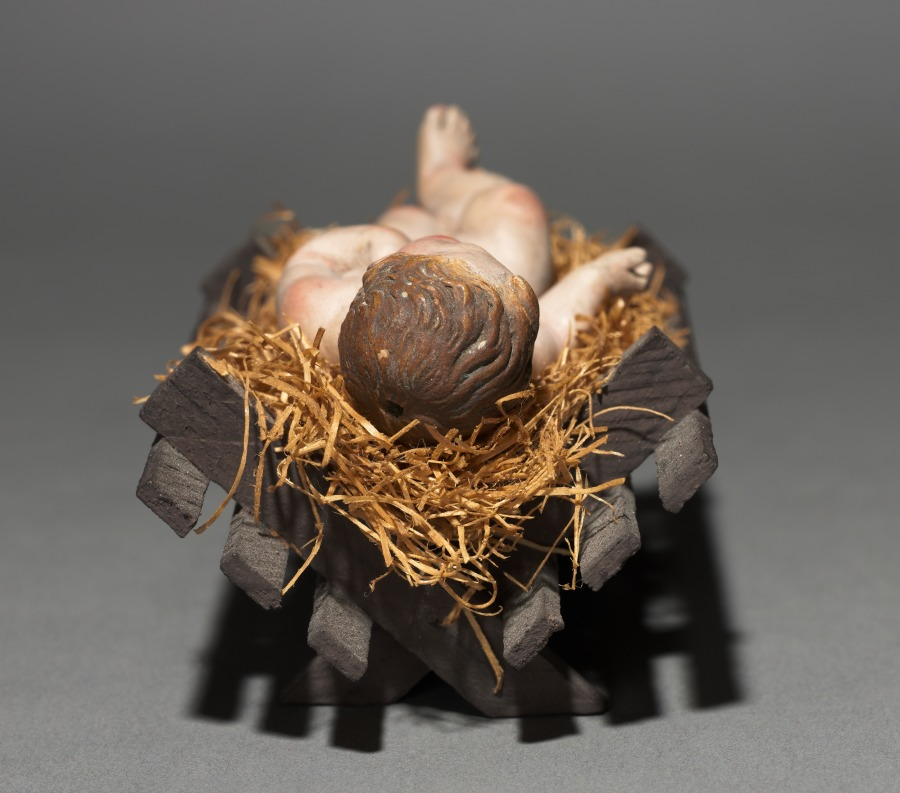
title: Figure from a Crèche: Infant Christ with Crib and Straw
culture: Italy, Naples, late 18th-early 19th century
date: 1780–1830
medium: painted terracotta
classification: Sculpture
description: The practice of creating scenes of the Nativity for the home dates from the early 1700s in Italy, where people began to set up doll-like figures of about a foot or less in height. The custom was particularly popular in Naples around 1800, where crèche scenes (crèche means cradle, or crib) included many figures, whose heads and hands of painted terracotta, stuffed cloth bodies, and clothing adapted from contemporary local costumes gave them an amazingly realistic character. Representations of the birth of Jesus can be traced to the first few centuries of Christianity. Both living creatures and sculptural depictions of them were used from early times. By the late middle ages it was customary to create life-size figures of wood or stone, naturalistically painted, to represent the characters who participated in the events of Jesus's early life. These sculptures were then arranged in scenes illustrating one or both of the most important of these events, the Adoration of the Shepherds and the Adoration of the Magi-the three kings from the East who came to pay homage to the Christ child. Used in churches, these large figures were especially popular in Italy, Central Europe, Spain, and Portugal. This Object in Focus presentation was organized by Henry Hawley, Curator of Renaissance and Later Decorative Arts and Sculpture.